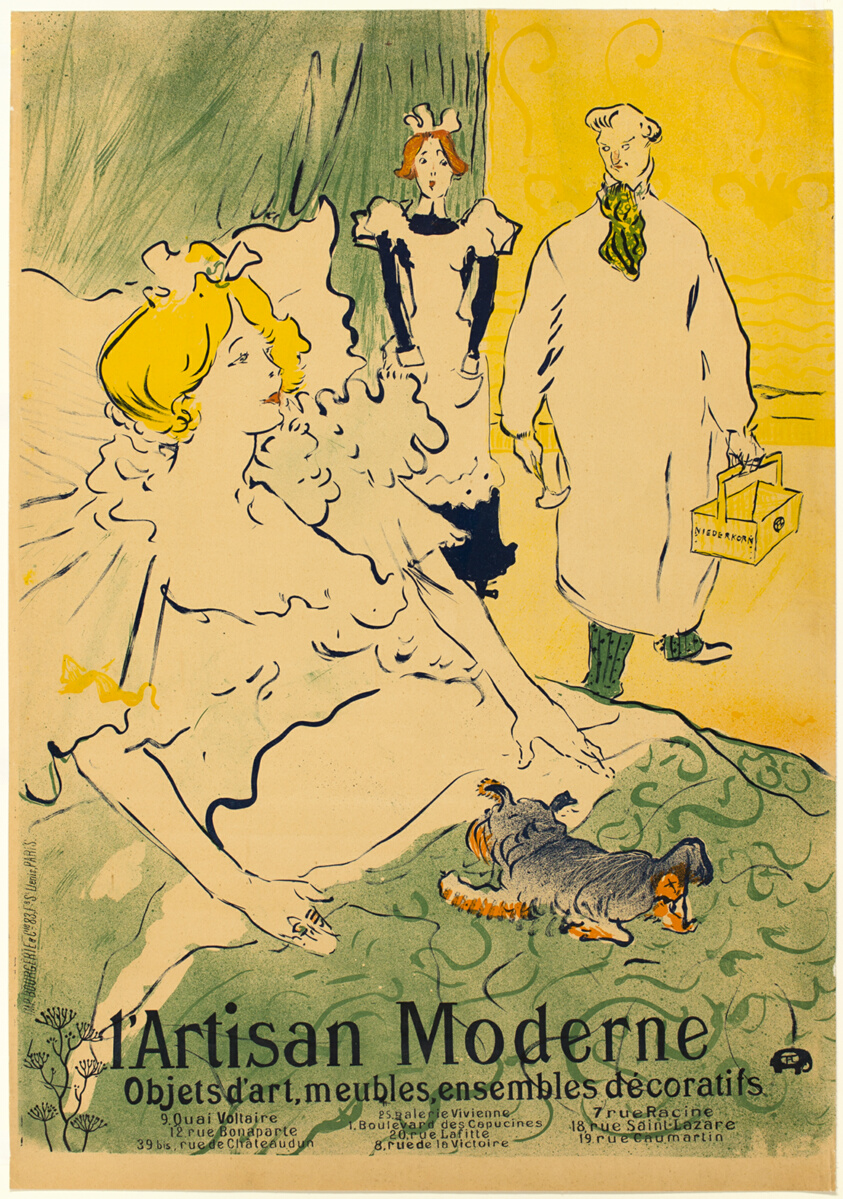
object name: Print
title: L'Artisan Moderne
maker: Henri de Toulouse-Lautrec (French, 1864-1901)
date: 1896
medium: Lithograph poster on tan wove paper, laid down on fabric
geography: France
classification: lithograph; poster; print; prints and drawing